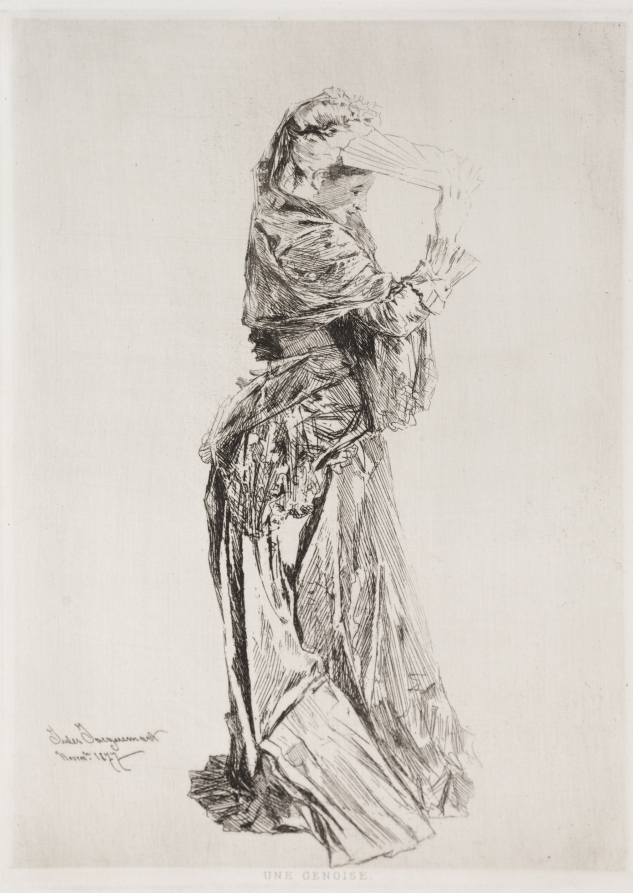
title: A Genoise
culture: France, 19th century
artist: Jules Jacquemart (French, 1837–1880)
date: 1877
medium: etching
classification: Print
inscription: in plate, lower right: Jules Jacquemart; lower left in plate: Novembre 1877